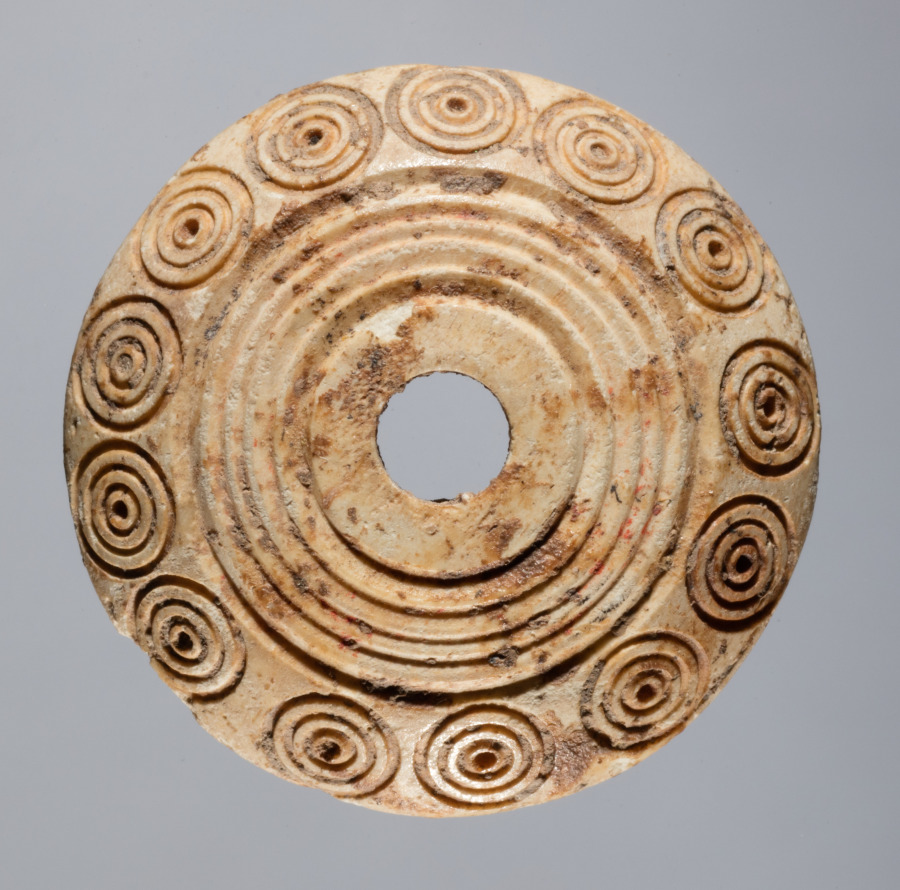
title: Spindle Whorl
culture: Iran, early Islamic period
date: 700s - 900s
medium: bone, incised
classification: Spindle Whorl